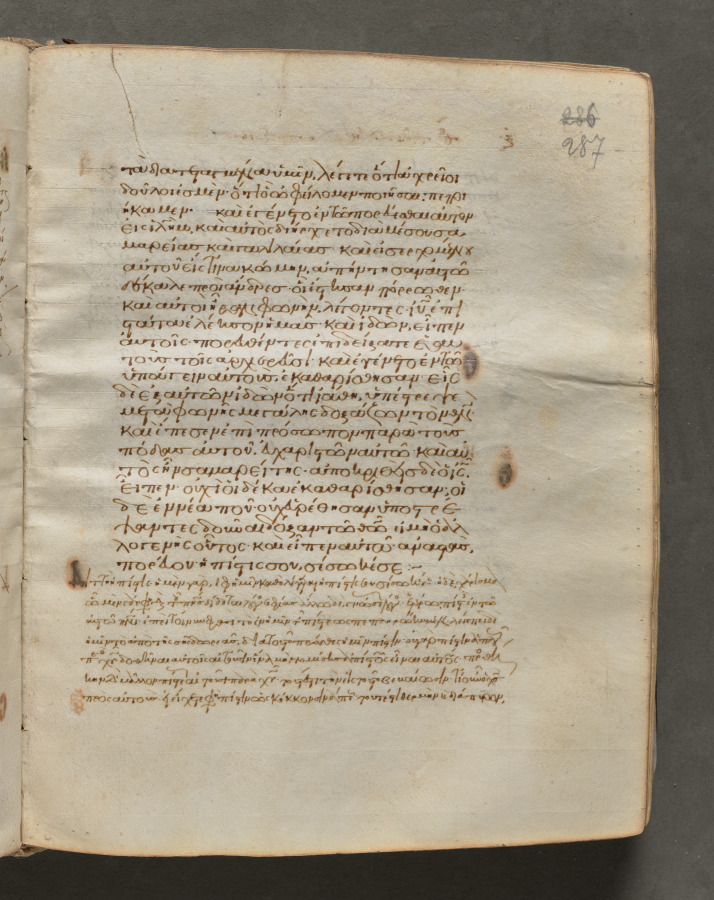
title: Text, folio 287 (recto), from a Gospel Book with Commentaries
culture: Byzantium, Constantinople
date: c. 1000–1100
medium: ink, tempera, and gold on vellum; leather binding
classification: Bound Volume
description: Each of the four gospels in this book opens on a page with brilliantly illuminated borders depicting the author of the text as well as birds—principally peacocks, symbols of the immortality of the soul—and fountains, representing the fountain of life and the salvation of the soul. This volume consists of 428 leaves with texts in Greek. Its level of sophistication suggests that it was probably written and decorated in a monastery in Constantinople.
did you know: Gospel books were carried in procession through Byzantine churches.